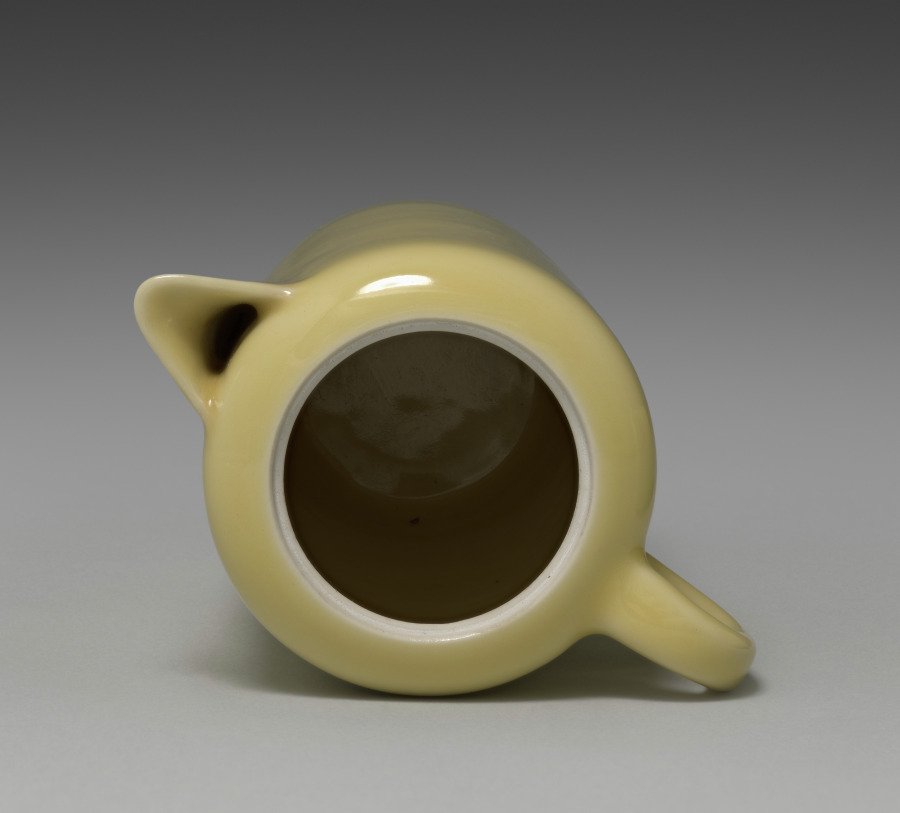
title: Sake Pourer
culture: Japan, Taishō period (1912–26) or Shōwa period (1926–89)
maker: Seifū Yohei IV (Japanese, 1872–1951)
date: 1914–46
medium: Porcelain with yellow glaze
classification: Ceramic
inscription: 清風造 。 【印】 清風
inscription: 成山清風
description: Like his father, Yohei IV also produced works with red or yellow monochrome glazes. His yellow-glazed works include this pair of sake pourers, a set of five drinking cups CMA 2022.217, and a sweets bowl molded into the shape of a chrysanthemum CMA 2022.218.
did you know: The lid's handle is made of bamboo.